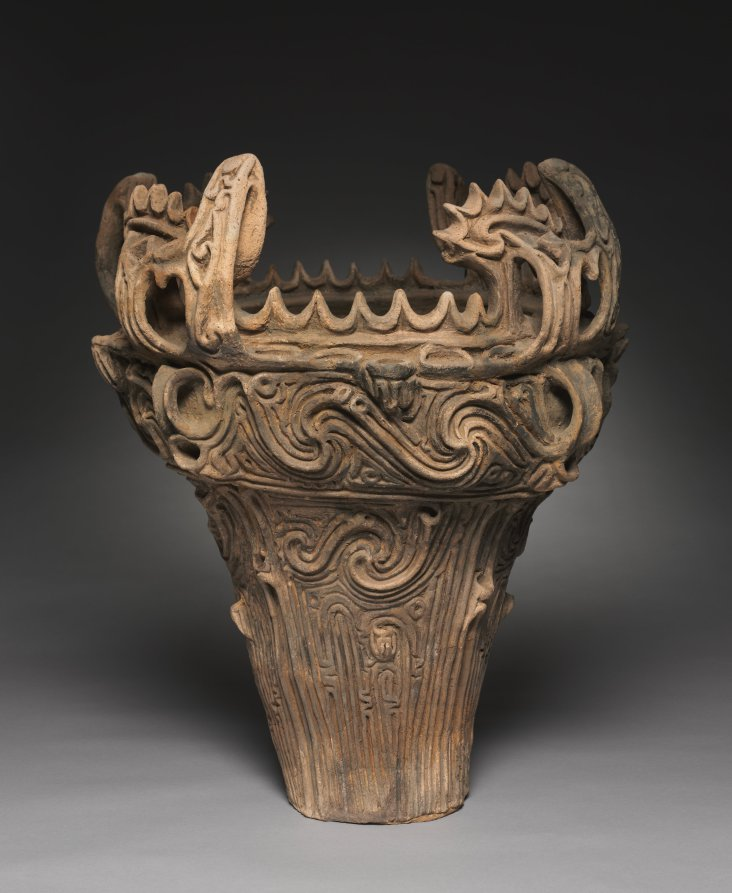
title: Fire-flame Cooking Vessel (Ka'en Doki)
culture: Japan, Jōmon period (c. 10,500–300 BCE)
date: c. 2500 BCE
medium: Earthenware with carved and applied decoration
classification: Ceramic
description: Archaeologists call this kind of vessel “fire flame,” ka’en in Japanese, because its top resembles flames. No one knows why the design was made or what it actually represents. This example is remarkable for the amount that is original. It was recently determined that a bottom from a different vessel was used during its reconstruction in the 1900s, creating a false impression of its intended scale; it would have initially been about four inches shorter. Since their lower portions were set into holes in the ground during use, bases of pots like this one often deteriorate and may be missing when they are excavated.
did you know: Scientifically tested residues from Jōmon vessels reveal that their makers consumed detoxified acorns.